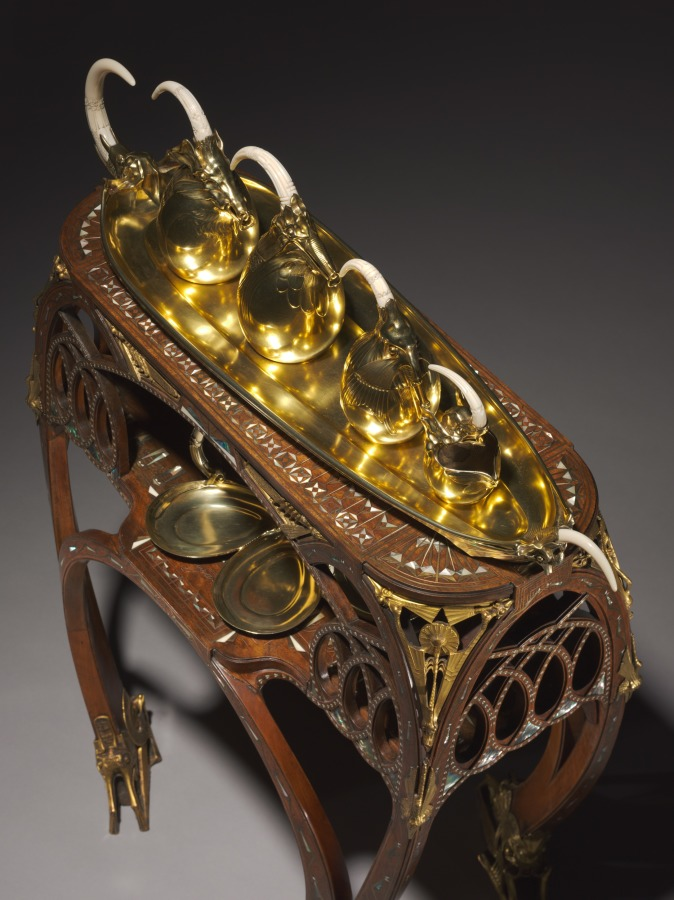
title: Tea Table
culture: France, Paris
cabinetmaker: Carlo Bugatti (Italian, 1856–1940)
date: c. 1907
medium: inlaid wood (mahogany?), cast and gilded bronze mounts, inlays of ivory or bone, metal, and mother-of-pearl (marine mussels or pearl oysters)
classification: Furniture and woodwork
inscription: signed in ligature in white metal inlay on central shelf: Bugatti.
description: Luxurious materials might catch the eye first, but a closer look reveals the imaginary creatures that adorn the surface of this table. Featuring elaborate arches, a favorite motif that appeared throughout Bugatti's furniture, this fantastical imagery is a window into the designer's expressive imagination.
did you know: Carlo Bugatti's sons achieved illustrious careers of their own. Rembrandt Bugatti (1884-1916) became a celebrated sculptor, and Ettore Bugatti (1881-1947) manufactured luxurious automobiles and racing cars.